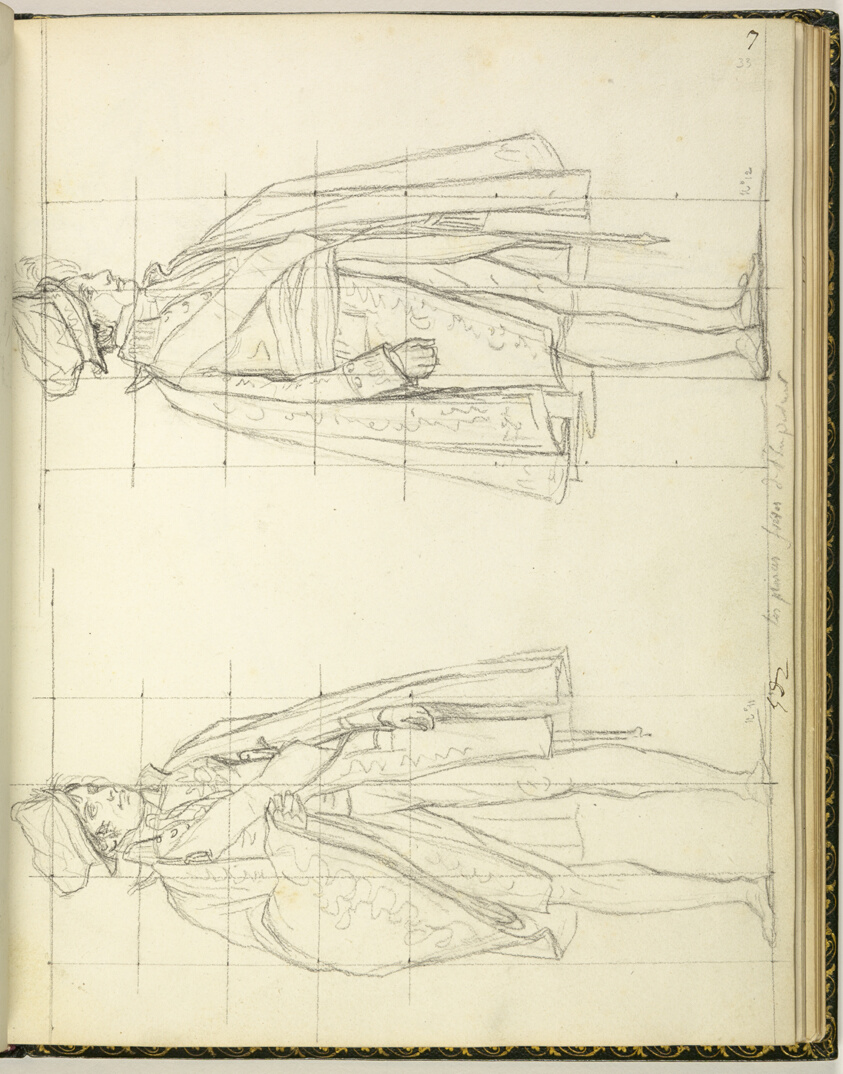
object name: Drawing and Watercolor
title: Sketchbook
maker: Jacques-Louis David; French, 1748-1825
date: 1809–10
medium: Graphite, black chalk, black crayon, and pen and brown ink drawings on wove paper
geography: France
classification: sketchbook; chalk; prints and drawing; paper